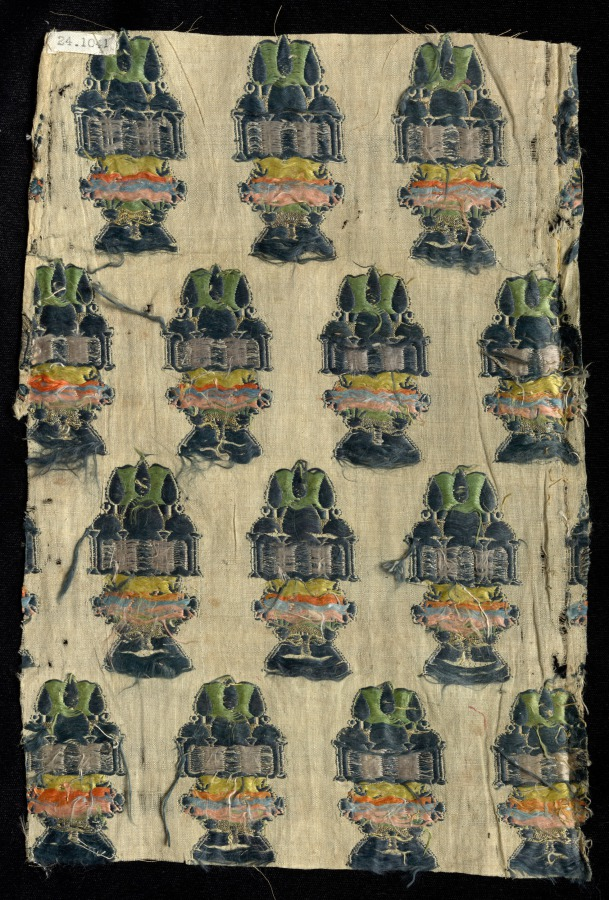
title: Fragment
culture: India, 19th century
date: 1800s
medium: brocade; silk and metal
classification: Textile